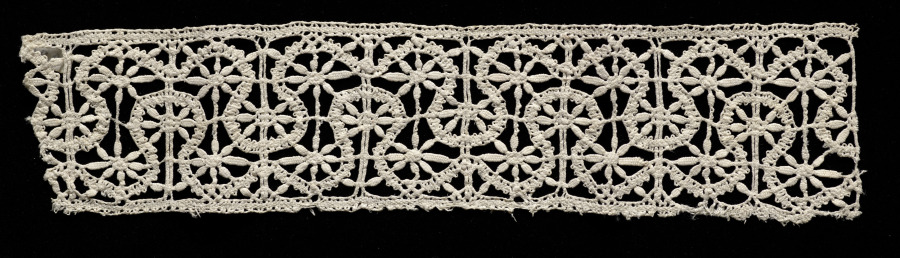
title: Lace Insertion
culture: Italy, Genoa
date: 1600–1650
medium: Bobbin lace (rose lace)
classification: Lace